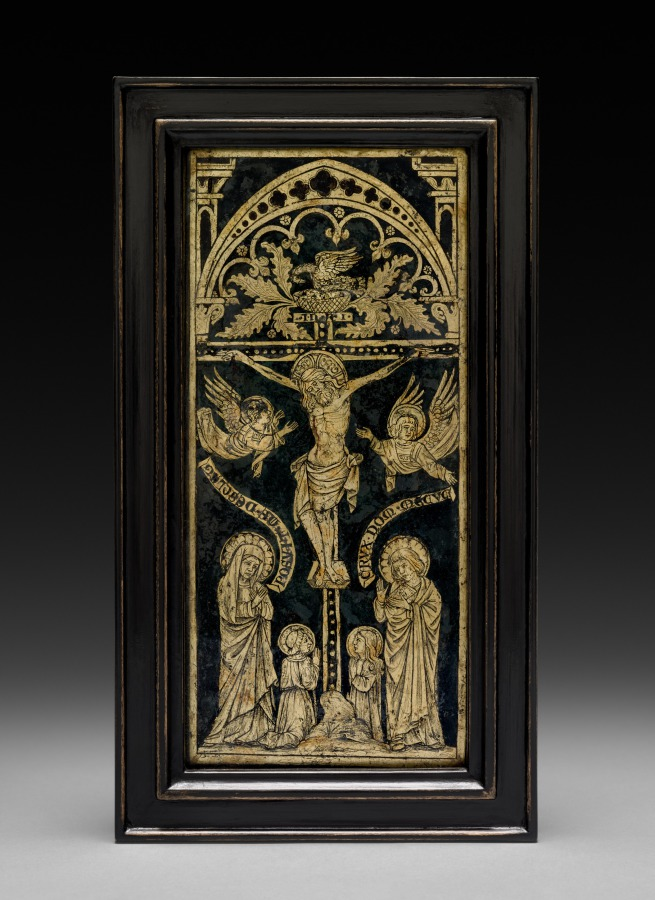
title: Plaque: The Crucifixion with Angels and Saints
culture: Northern Italy, Padua?, 15th century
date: c. 1400–1425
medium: verre églomisé (reverse gilded glass, engraved and painted)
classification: Glass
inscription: the letters on the banderoles may be described as a composite script called Gothic majuscule, which intermingles Roman capitals and uncial alphabets. This script was especially favored by Italian artists for inscriptions in architecture, sculpture, panel painting, and manuscript illustrations during the 14th and 15th centuries. The banderole on the left reads: "POSVIT. ME. DESOLAT.[UM]" (God has forsaken me); the other banderole reads: "CRUS. DOMINI. MECUM" (the cross of the Lord is with me). A third inscription with the abbreviations for the words of Pilate--"I. N. R. I." (IESUS, NASARENUS RES IUDAEORUM), or Jesus of Nazareth, the King of the Jews" appears on the plaque (tabula ansata) at the top of the cross.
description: Small glass plaques like this were often combined with plaques of painted wood and framed within elaborate architectural reliquaries or small altarpieces. The decorative technique, called verre églomisé, is a process in which the reverse side of a glass is gilded and then engraved with designs. The pelican, shown above the cross piercing its breast to feed its young, became a common symbol of Christ's sacrifice on the cross.